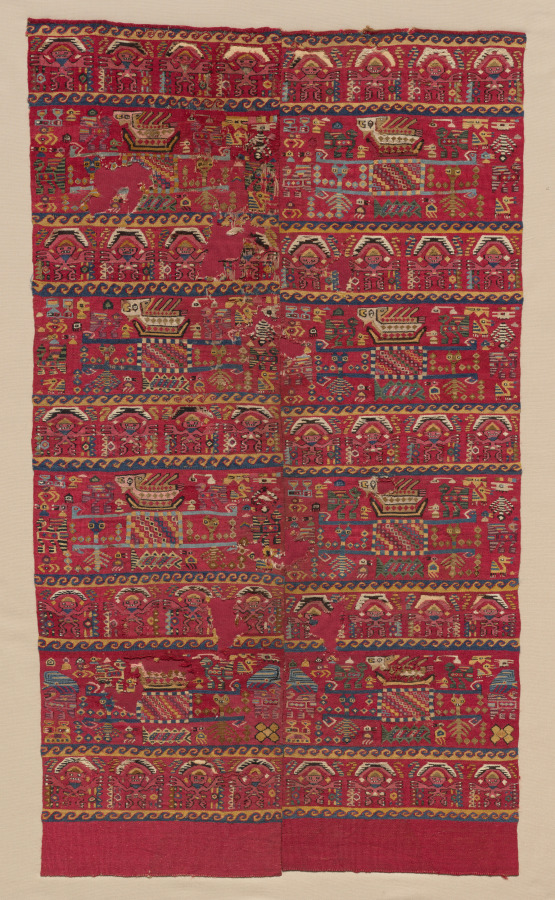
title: Two Tapestry-woven Panel Fragments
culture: Central Andes, North Coast, Chimú people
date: 1000–1460s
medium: camelid fiber and cotton, tapestry weave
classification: Tapestry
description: These two fragments, mounted side-by-side, come from the Chimú (chee-moo) Empire of Peru’s north coast. Each features horizontal rows containing four frontal figures. The rows alternate with wider registers, each with an H shape that represents a litter seen from above. A form of transport reserved for only the most esteemed members of society, the litter would have been carried by human porters via poles at each corner. Scattered around each are small creatures, including birds, a fish (located beneath), and two insect-like creatures posed as if they were carrying the litter. The objects hovering above the litter have not been identified.